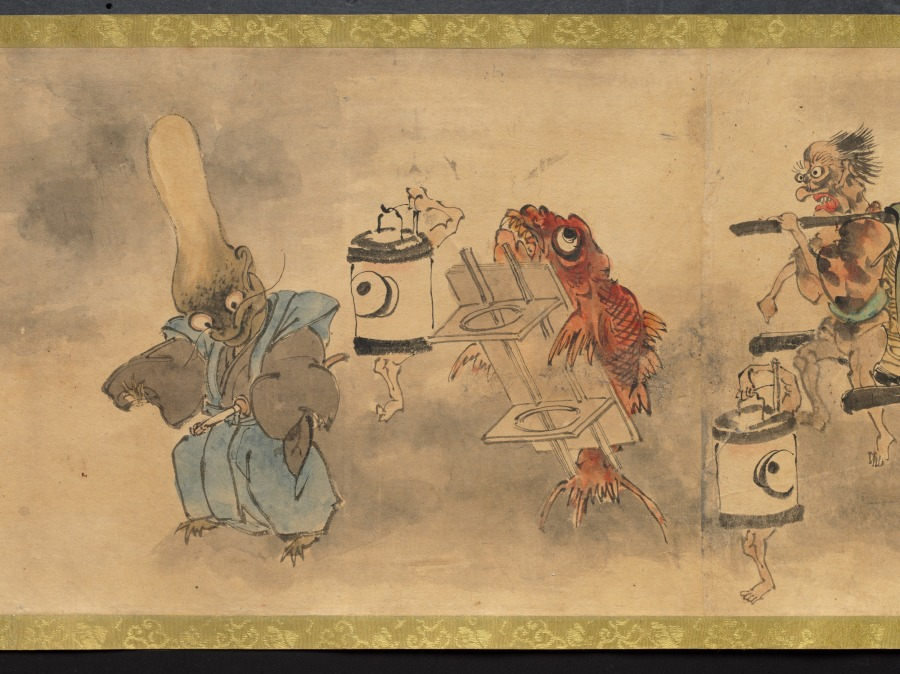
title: An Illustrated Marriage of Apparitions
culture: Japan, Edo period (1615–1868)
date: mid-1800s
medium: handscroll; ink and color on paper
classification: Painting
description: The matchmaking, engagement, wedding, and birth of the first child of two apparitions, or bakemono, literally "things that change," are illustrated in this whimsical, humorous handscroll. Japanese folklore abounds with such strange creatures, most famously represented in handscrolls featuring a procession of 100 supernatural monsters. Aside from a textual preface and cartouches indicating the content of the scenes, the tale is told visually. The artist and whereabouts of the original handscroll are unknown, but a number of other 19th-century copies by amateur painters exist in Japanese collections, attesting to its broad appeal.